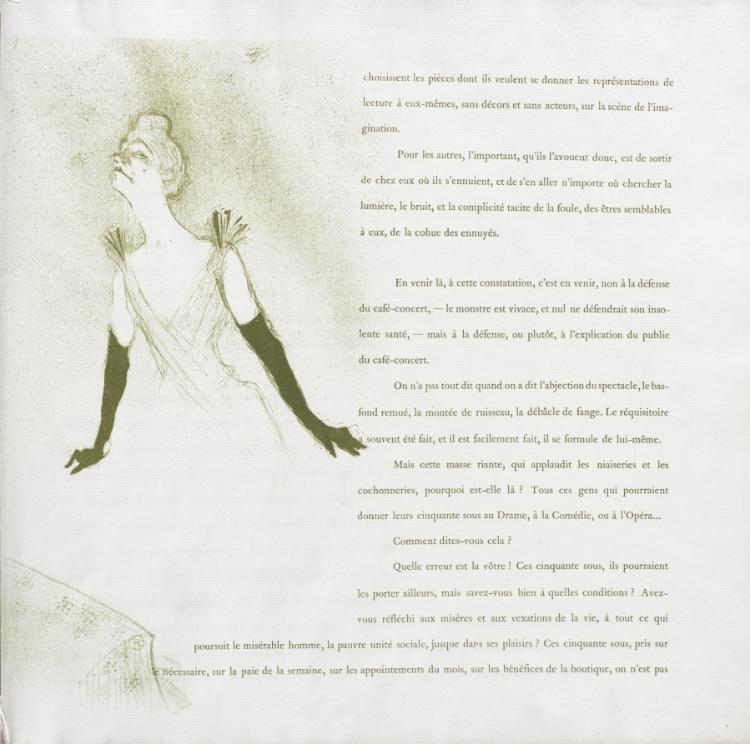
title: Yvette Guilbert-French Series: No. 4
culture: France, 19th century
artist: Henri de Toulouse-Lautrec (French, 1864–1901)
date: 1894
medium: lithograph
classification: Bound Volume